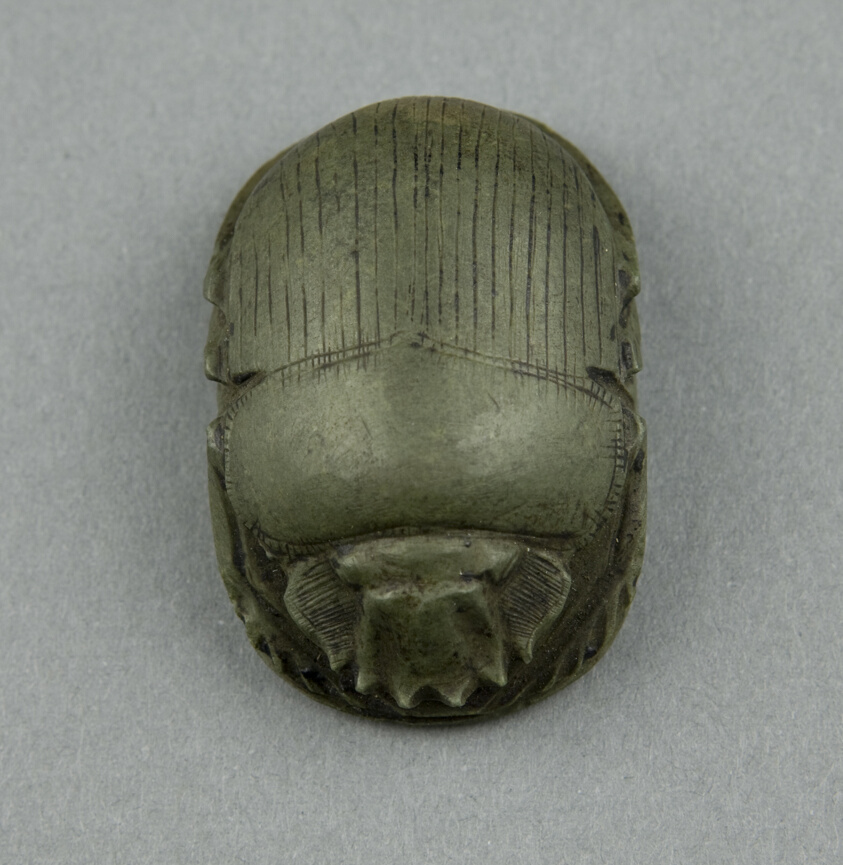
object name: Costume and Accessories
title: Heart Scarab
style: third intermediate period, egyptian, ancient, late period (egyptian), twenty-fifth dynasty, twenty-first dynasty, twenty-fourth dynasty, twenty-second dynasty, twenty-sixth dynasty, twenty-third dynasty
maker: Egyptian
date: Third Intermediate–Late Period, Dynasty 21–26 (about 1069–664 BCE)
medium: Stone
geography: Egypt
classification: scarab; stone; ancient art; amulet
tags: scarab beetle, insects